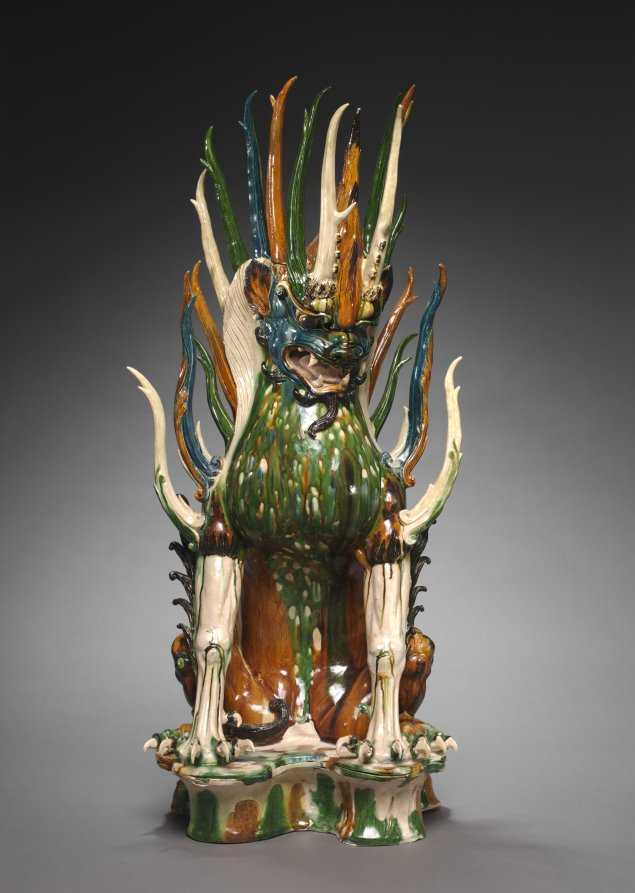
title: Tomb Guardian with Animal Head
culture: China, probably Shaanxi province, Xi'an, Tang dynasty (618-907)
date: early 700s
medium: glazed earthenware, sancai (three-color) ware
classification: Ceramic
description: With their fierce expressions and exaggerated physical features, fantastic guardian creatures were intended to guard the entrance to a tomb, warding off evil as well as keeping the soul of the deceased from wandering. Known as "earth spirits" or qitou, this one has an animal face and a pair of antlers growing above its eyebrows; the other sports a human face with huge protruding ears and a short horn surrounded by fiery, twisting hair. Their many elongated spikes heighten the fearful intensity. Before tomb sculptures were placed in the tomb, they were carried through the streets in a funerary procession. Funerary gifts provided the deceased with means for the afterlife. They were also an expression of filial piety and demonstrated the wealth and power of the descendants.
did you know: Sancai (three-color) glazes in green, amber, and transparent white, plus expensive cobalt blue glaze, show the high social status of the tomb’s occupant.